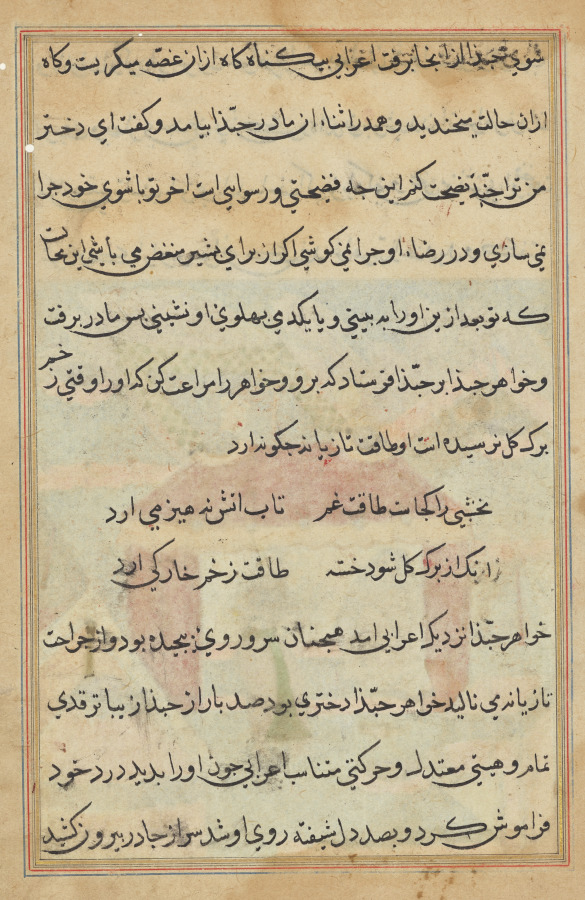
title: Page from Tales of a Parrot (Tuti-nama): text page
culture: Mughal India, court of Akbar (reigned 1556–1605)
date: c. 1560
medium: gum tempera, ink, and gold on paper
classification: Painting